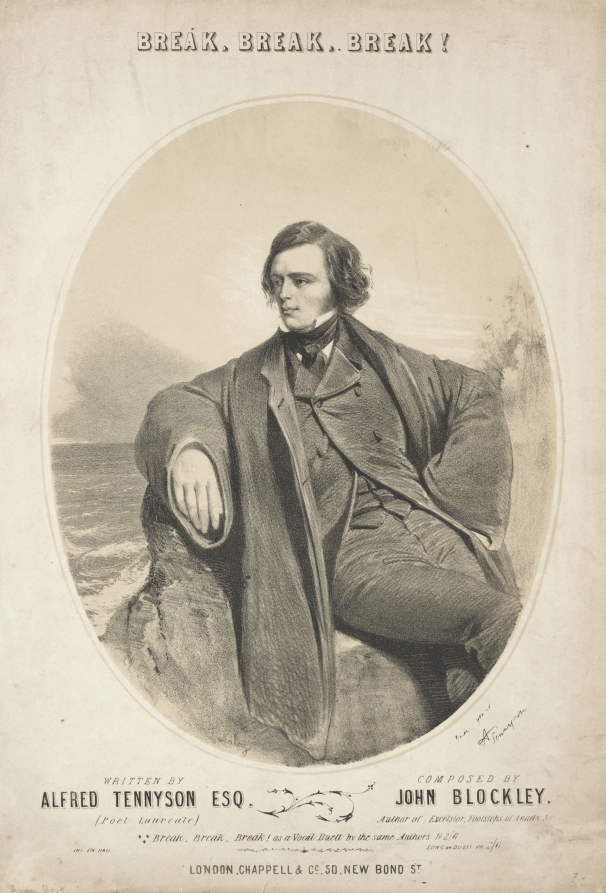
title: Break, Break, Break!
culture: England, 19th century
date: 1800s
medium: lithograph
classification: Print